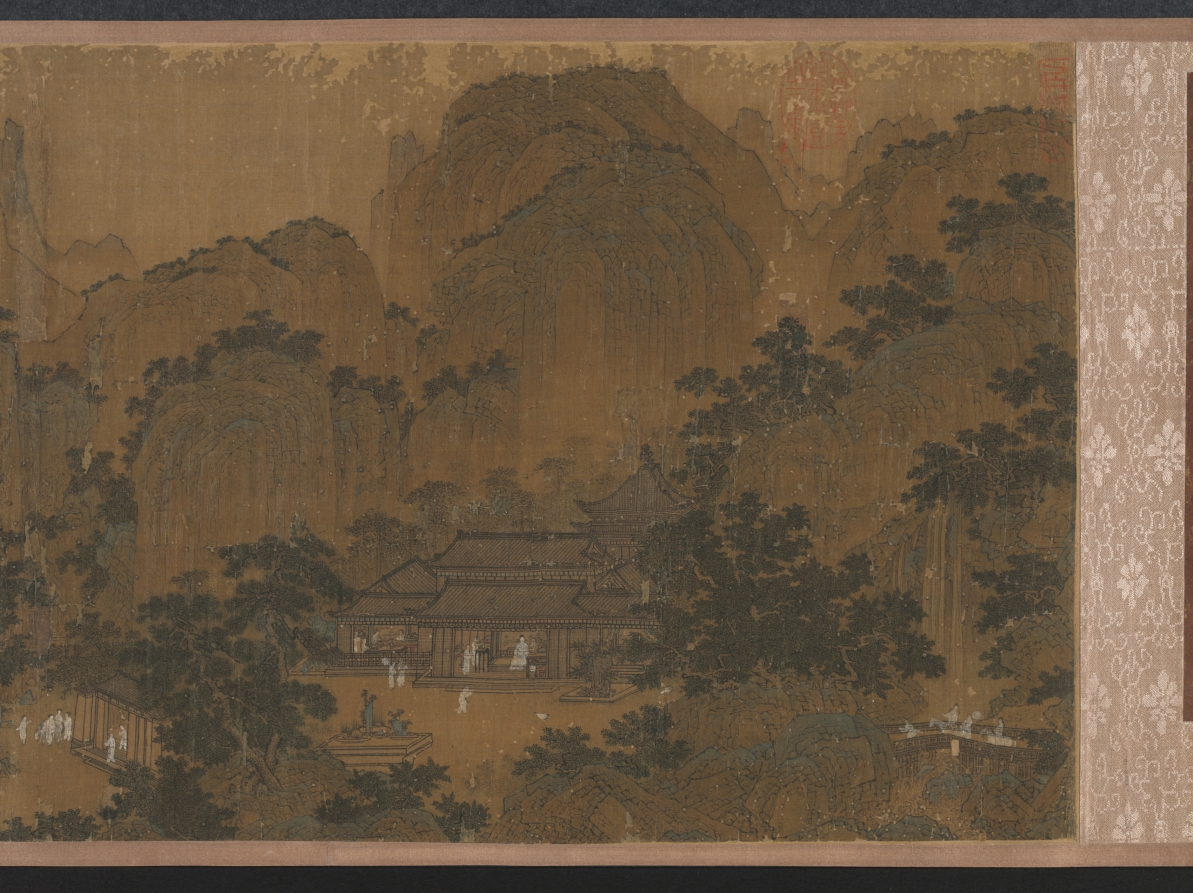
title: Waiting for the Moon in the Mid Autumn Festival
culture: China, Ming dynasty (1368–1644)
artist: Shi Rui (Chinese, c. 1400-c. 1470)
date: 1400s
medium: handscroll, ink, color, and gold on silk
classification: Painting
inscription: [印] 石氏以明; 游戯翰墨.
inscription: 僊山樓觀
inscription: 1 inscription, dated 1639, and 1 seal of Xiao Yuncong 蕭雲従 (1596-1673). Inscription by Xiao Yuncong: This is a painting by the Junior General Li. The painting is damaged and cracked at many places. Many of the paper strips for backing have been missing since long ago, but the colors are still fresh as if they had just been applied and the ink still looks moist. During the reign of Tianbao (742-756) of the Tang Dynasty, the Imperial Klansman Li Sixun was summoned to paint the walls of the Datong Hall. He was known as the "Senior General." His son, who came to be known as the "Junior General," was named Zhaodao. Of the stone epitaph [Li Sixun bei, or the "epitaph of Li Sixun," one of the best known calligraphic monuments of the Tang Dynasty], engraved with the calligraphy of Li Beihai 李北海 [Li Yong 李邕, 678-747], more than half has fallen off. Why, in contrast, was this painting able to survive? Or could it be that despite the fact that the stone is hard and the silk is soft, their preservation or destruction depends on some other factors? Moreover, since they were titled nobility of imperial descent, it is doubtful that they had the leisure and the mood to indulge in such decorative and descriptive blue and gold painting for the mere amusement of their fellow men. Recently, I read the Yi zhou ming hua lu 益州名畫錄 [by Huang Xiufu 黃休復, preface 1005]. I found a certain Li Chin-nu who compared himself with Li Zhaodao 李昭道 and was called by the Sichuan people the Junior General Li. In a painting which he did, entitled Mt. Ch'ing-ch'eng, the architectural structure of the pavilions, terraces, bridges, and boats are meticulous and accurate. The horsemen on a spring outing are as small as grain and the wild geese among the clouds as tiny as dust. It was also said that he painted on silk of any length in accordance to specific commissions. Is it possible that this painting is one of his? Since that time 700 years have passed. Yet one of the two Junior General Li's must be our painter. Formerly, there were the so-called "Four Excellents" in the Hall of Portraits of the Buddhist monk Wu-ta Kuo-shih: the [portrait] painting by Ch'ang Ts'an [act. ca. 881-888}, the calligraphy by Priest Tao-ying, the eulogy by Li Shangyin 李商隱 [813-858], and the landscape by Li Sheng [act. ca. 908-925]. This Li Sheng was styled Chin-nu and was also called Junior General Li. In the tenth month of the Chi-mao year, the twelfth year of the Chongzhen era [1639], recorded by Xiao Yuncong of Wuhu. trans. WKH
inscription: 4 colophons and 30 additional seals: 1 seal of Xu Qianxue 徐乾學 (1631-1694); 1 seal of Li Chien 黎簡 (1747-1799); 1 seal of Chang Chin-fang (18th c.); 2 seals of Sun Erzhun 孫爾準 (1770–1832); 1 colophon and 2 seals of Zhang Weiping 張維屛 (1780-1859); 1 seal of Wu Rongguang 吳榮光 (1773-1843); 1 colophon and 2 seals of Luo Tianchi 羅天池 (1826 jinshi); 7 seals of Wu Yanhui 伍元蕙 (active 1821–1851); 2 colophons and 4 seals of Pan Zhengwei 潘正煒 (1791-1850); 9 seals unidentified.